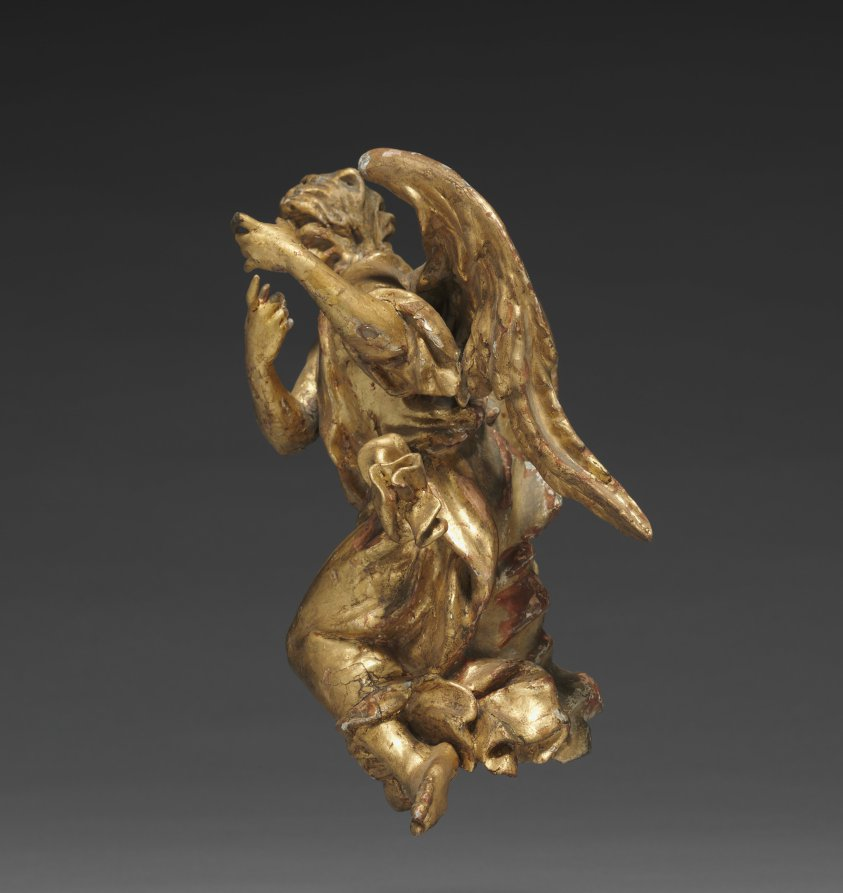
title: Altarpiece with Relics - Angel, lower right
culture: Germany, Bavaria, 18th century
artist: Joseph Matthias Götz (German, 1696–1760)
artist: and Workshop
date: c. 1735–1740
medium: gilded wood, with relics in niches: gilded wood, mother-of-pearl, ebony, red silk, gold wire, seed pearls, rock crystal, pen and ink on paper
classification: Sculpture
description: Götz covers every surface in gold leaf, giving each part of the object equal importance, rather than simply framing a central picture. In this distinctively Central European approach, figural narrative is subordinate to the overall ensemble. Götz designed this object to rest on top of an altar, probably in front of a larger painted or sculpted decorative scheme. The work contains relics seen through the small windows on the perimeter. These small remains of holy figures demonstrate the persistence of a medieval Catholic tradition well into the 1700s.